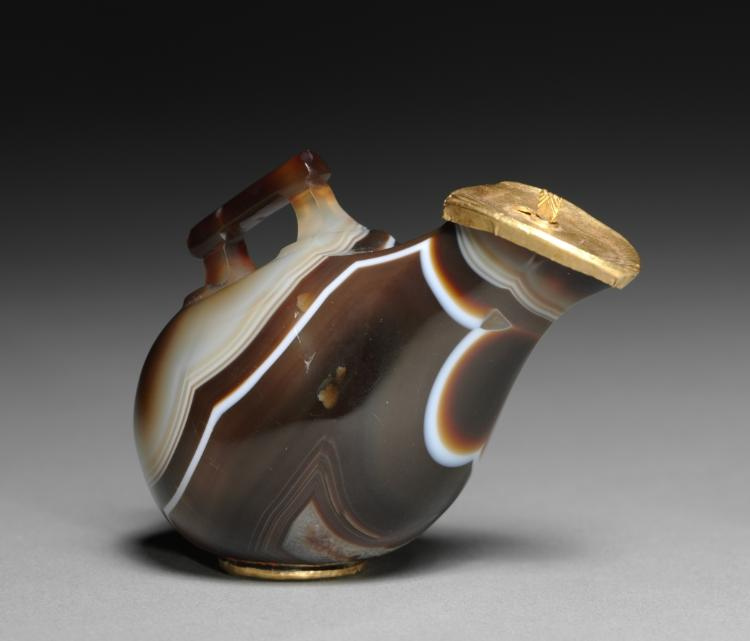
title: Askos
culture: Greece, Ptolemaic Dynasty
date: 200–1 BCE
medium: agate and gold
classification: Cosmetic Objects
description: This miniature vessel was carved from a single piece of banded agate, polished to a shine, and embellished with a gold lid and gold details on the base. Inside the ring of gold at the base is a trio of gold papyrus stalks, a likely reference to Egypt. In shape, it resembles an ancient wineskin, or askos, though its small size suggests use for luxury perfumes or oils. A tiny crab, likely once inlaid with a precious material, has been carved behind the handle.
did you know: The knob on the lid connects to a hidden disk to control the flow of liquid.